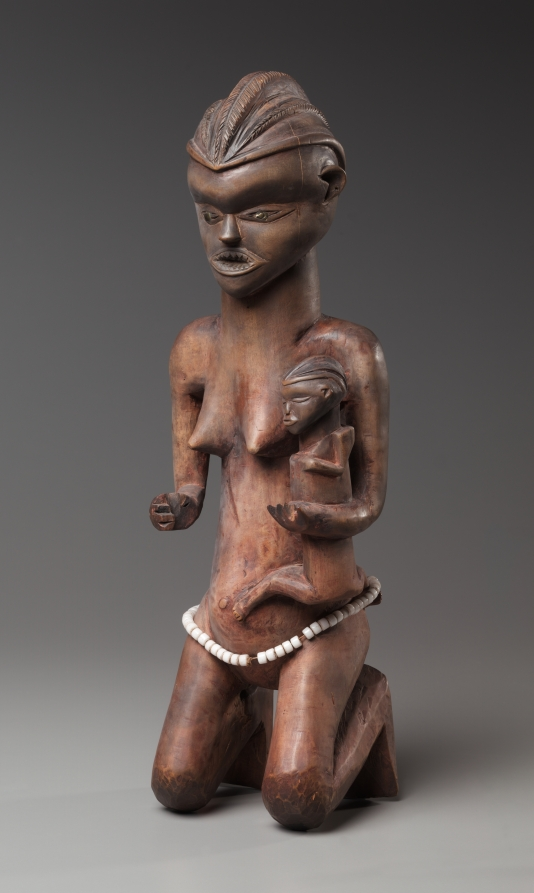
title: Mother-and-Child Figure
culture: Africa, Central Africa, Democratic Republic of Congo, Pende-style maker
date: late 1800s–early 1900s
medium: Wood, glass beads, upholstery studs, natural fiber, and pigment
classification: Sculpture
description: Wearing an elaborate lobed headdress and a beaded waistbelt, and having filed teeth and red-powdered skin, this maternity figure seems to have once carried an ax and a cup, wooden imitations of the two most important chiefly attributes. Perhaps together with a male counterpart, it was secretly kept inside the ritual house, serving as a guardian of the chief’s treasure. Its style places it in the westernmost corner of Pendeland, between the Lutshima and Kwilu rivers.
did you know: Eastern Pende carvers also once made larger mother-and-child sculptures to adorn the tops of chiefs' ritual houses.